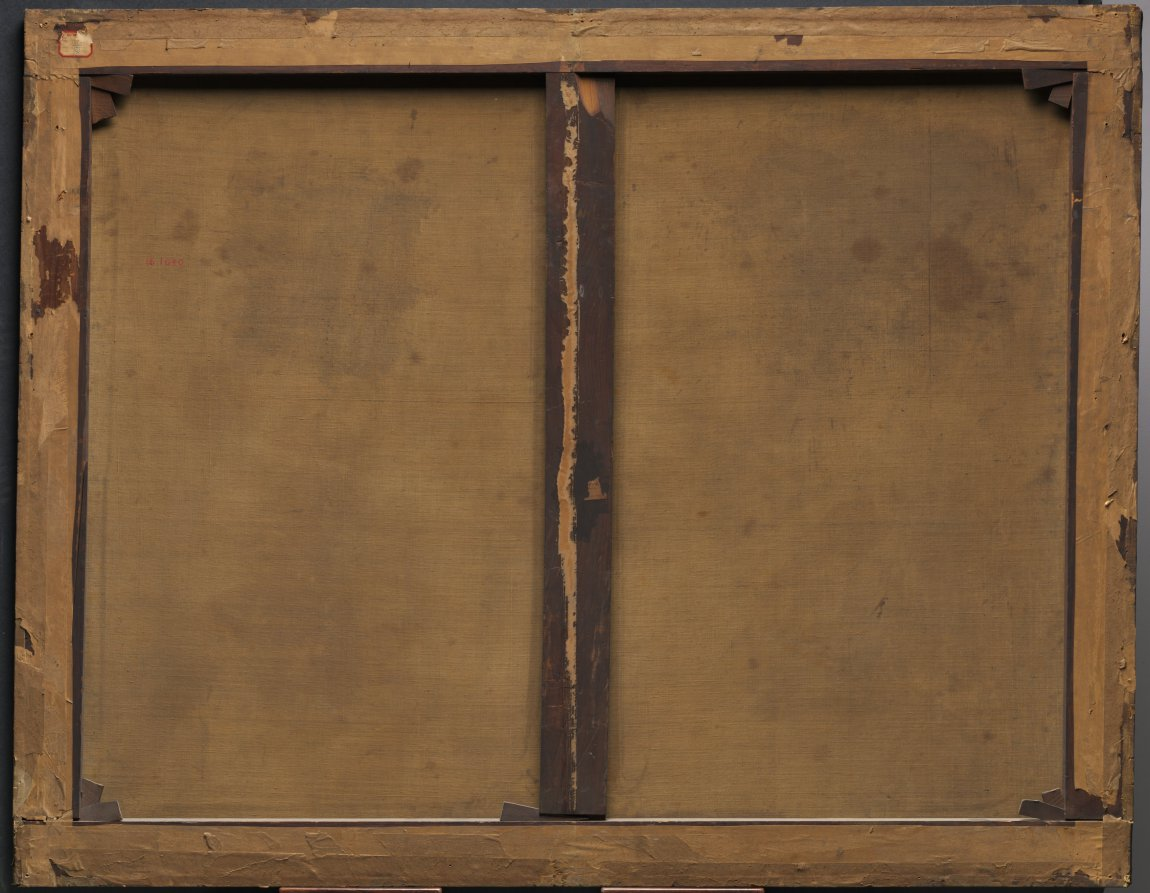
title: Carthage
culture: England, 19th century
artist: attributed to William Linton (British, 1791–1876)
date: c. 1830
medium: oil on fabric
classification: Painting